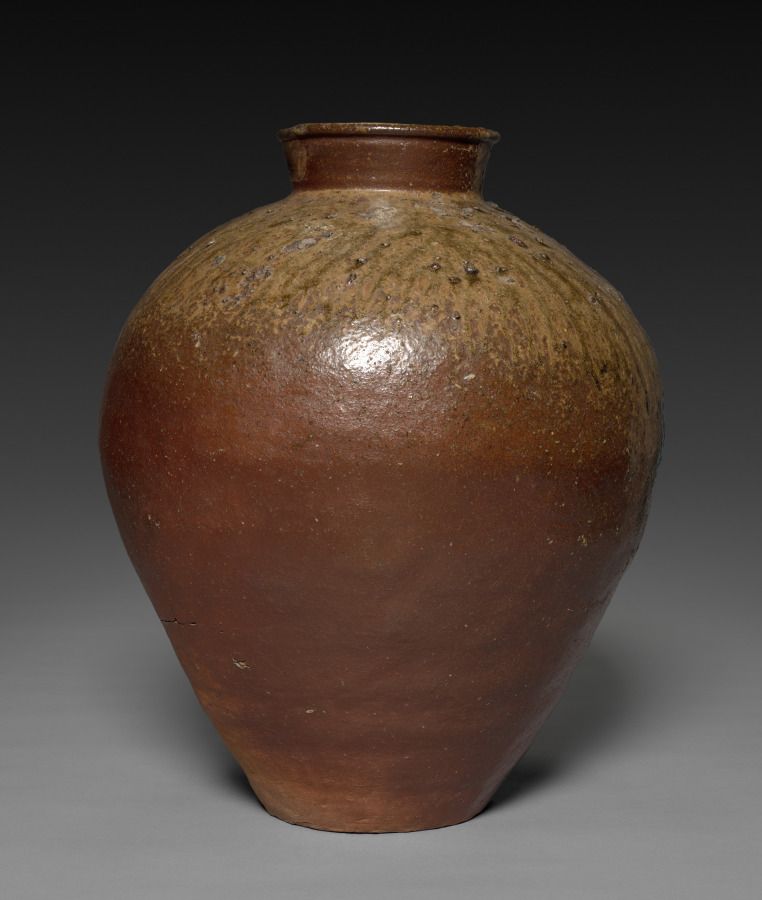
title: Storage Jar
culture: Japan, Muromachi period (1392–1573)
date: 1400s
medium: Stoneware with natural ash glaze (Echizen ware)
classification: Ceramic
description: Located in present-day Fukui prefecture northeast of Kyoto, the Echizen kilns produced ceramics with purplish-red skin flecked with white feldspar characteristic of the local clay used in this piece. Around 1700, the warm hue of Echizen wares gained popularity in tea practice, particularly when the vessels exhibited the rugged surface evident here in combination with the dynamic glossy glaze drips.